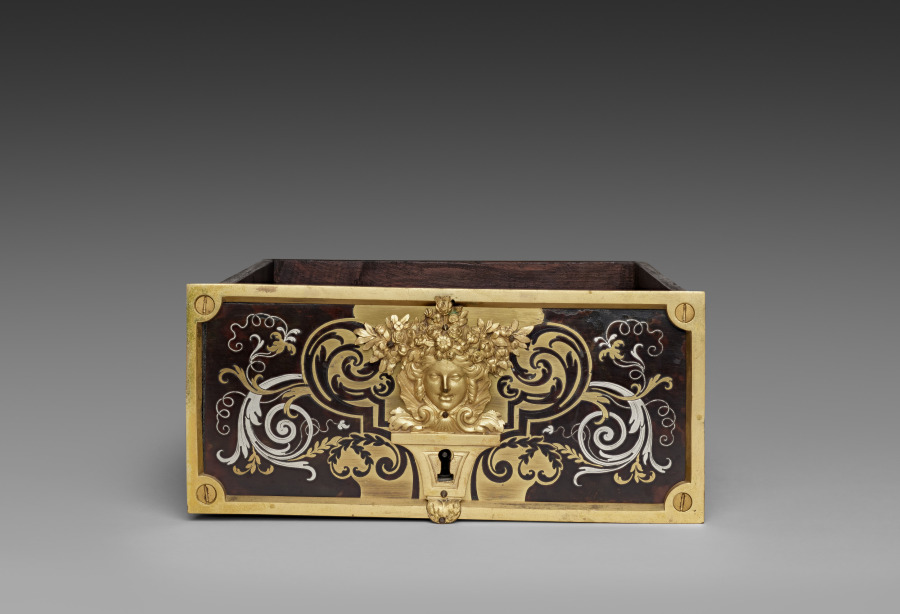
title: Side Drawer for Cabinet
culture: France, late 17th Century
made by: André-Charles Boulle (French, 1642–1732)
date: c. 1690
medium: ebony, marquetry in metal and tortoise shell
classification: Furniture and woodwork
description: Appointed cabinetmaker to King Louis XIV in 1672, André-Charles Boulle became a master of furniture making in France during the late 1600s until his death in 1732. Known primarily for his use of marquetry, in which metal patterns are inlaid into tortoiseshell then applied within the veneered surface of the furniture, Boulle established a level of quality and craftsmanship few others could achieve. As a result, his work found favor at the royal court and among other aristocrats and diplomats eager to impress the king. The inclusion of a medallion depicting Louis XIV within the bronze decoration of this chest would have identified the owner with the royal court. Often exhibiting stout architectural proportions with elegant groups of inlaid motifs such as the parrot on the central panel of this chest, Boulle’s designs are an example of the intellectual fashion for contrasting ideas, materials, and motifs.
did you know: Originally designed to sit atop an elaborate tall stand, this chest was likely altered in the late 1700s to reduce its scale and height.